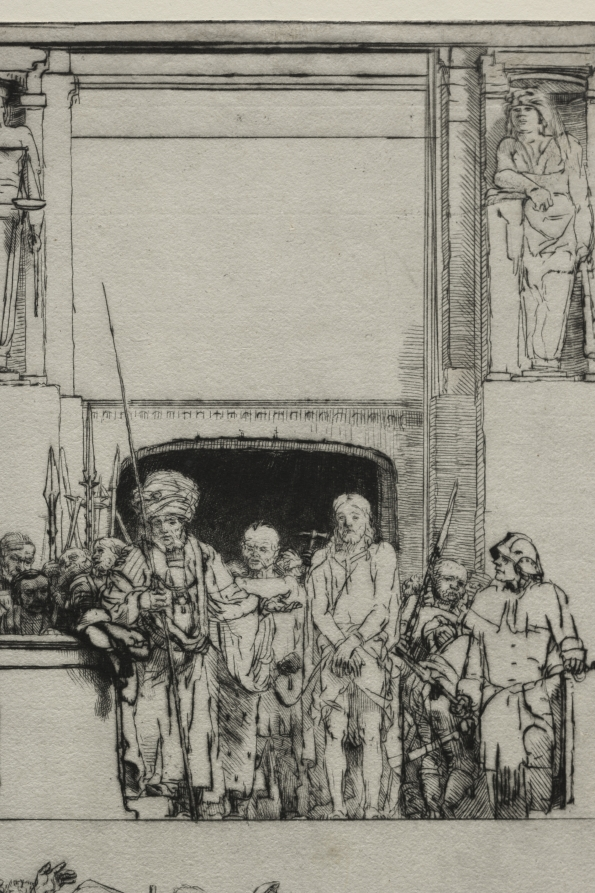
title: Ecce Homo. Christ Presented to the People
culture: Netherlands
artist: Rembrandt van Rijn (Dutch, 1606–1669)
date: 1655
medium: drypoint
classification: Print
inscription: Recto, upper left, in graphite: 79; lower left: FPS. Verso, in purple ink: Prince of Liechtenstein or Colnaghi for Liechtenstein stamp; in black ink, Zinser stamp, castle tower (rook chess piece); along side, in graphite: No. 36; along top: (illegible) name; upper left, in graphite: No 79 P(?) G (?) La Second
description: Rembrandt was an experimental and innovative printmaker and the first to execute works in pure drypoint on this monumental scale. Drypoint produces blurred lines and rich, velvety shadows, but these effects are lost as the plate wears. A limited number of rich impressions exist like this fine example of the fifth state, which demonstrates how Rembrandt redefined the expressive potential of printmaking. Rembrandt’s habit of drawing from life made him a keen observer of behavior and body language, endowing his biblical scenes with a human dimension and veracity not seen previously. The throng in Christ Presented to the People represents a cross section of the population and reflects the pictorial tradition that common humanity condemned Christ. Large areas of the imposing building, symbolizing the crushing weight and authority of the state, remain unworked so that blank white paper seems radiant in contrast to rich black shadows.